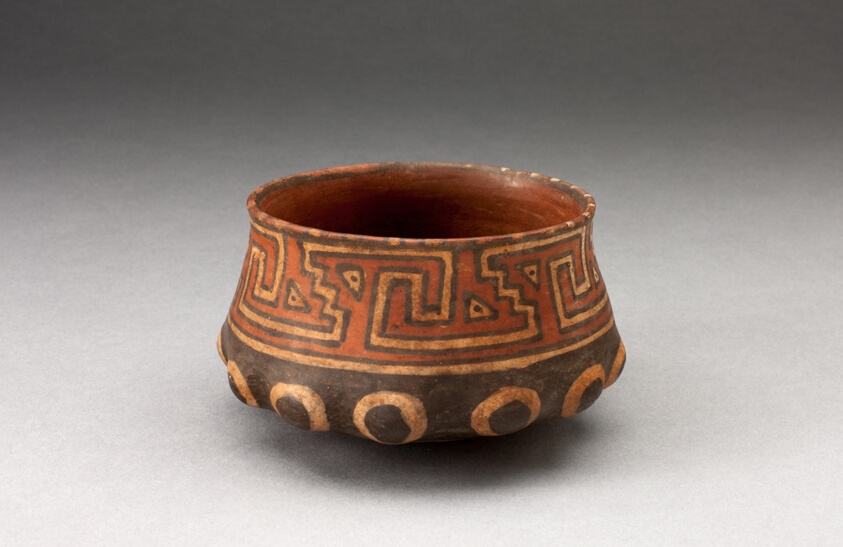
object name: Vessel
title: Miniature Bowl with Shaped Base and Geometric Motifs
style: ica, late intermediate period, Pre-Columbian, americas, Arts of the Americas, andean, andes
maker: Inca (South coast or southern highlands, Peru)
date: 1450–1532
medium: Ceramic and pigment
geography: Southern Peru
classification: bowl; earthenware; ceramics; vessel; art of the americas